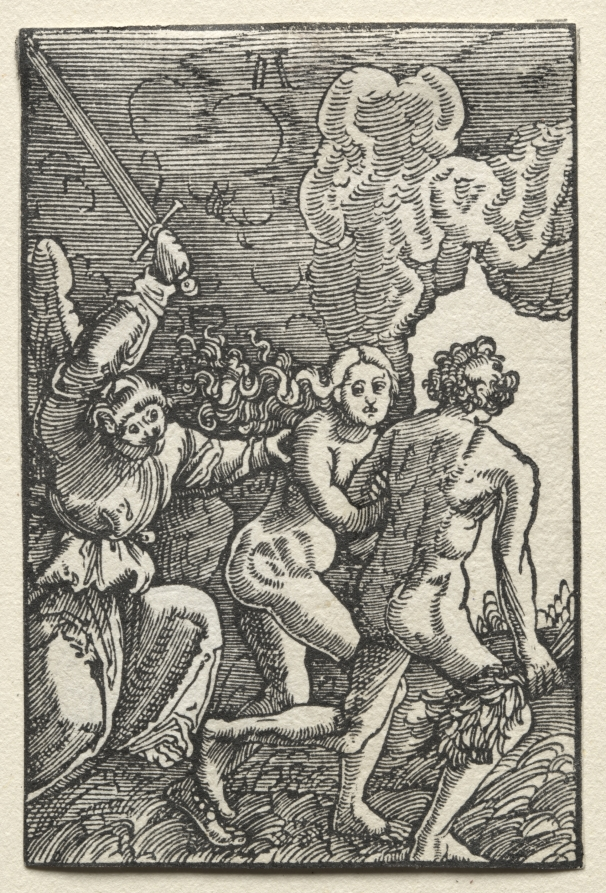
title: The Fall and Redemption of Man: The Expulsion from Eden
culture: Germany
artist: Albrecht Altdorfer (German, c. 1480–1538)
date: c. 1515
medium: woodcut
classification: Print